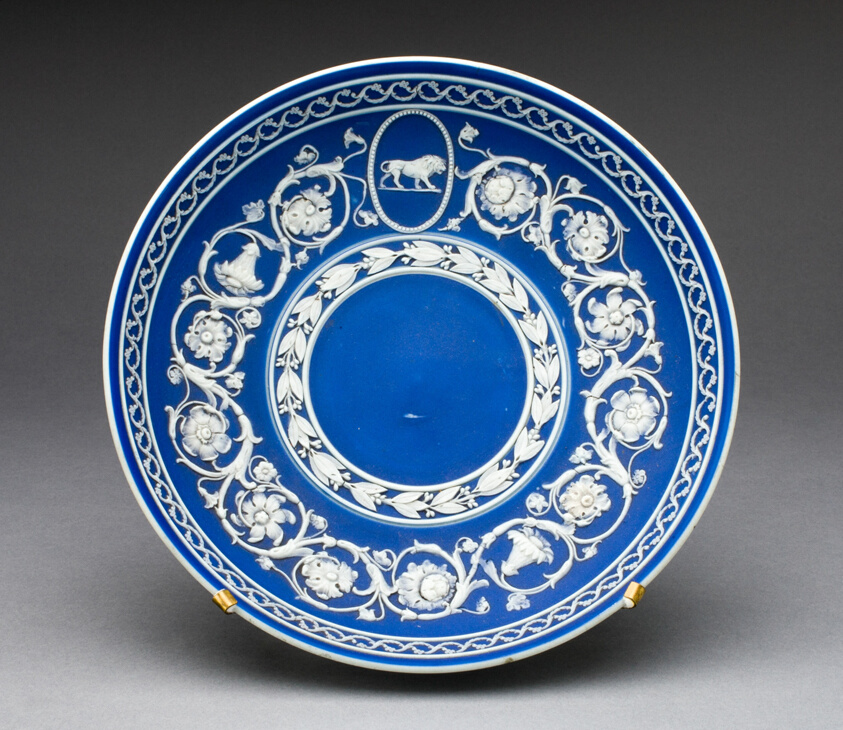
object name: Ceramics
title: Plate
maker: Wedgwood Manufactory (England, founded 1759)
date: c. 1780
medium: Stoneware (jasperware)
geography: Burslem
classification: plate (general, dish); tableware; dish (vessel); stoneware; european decorative arts; ceramics